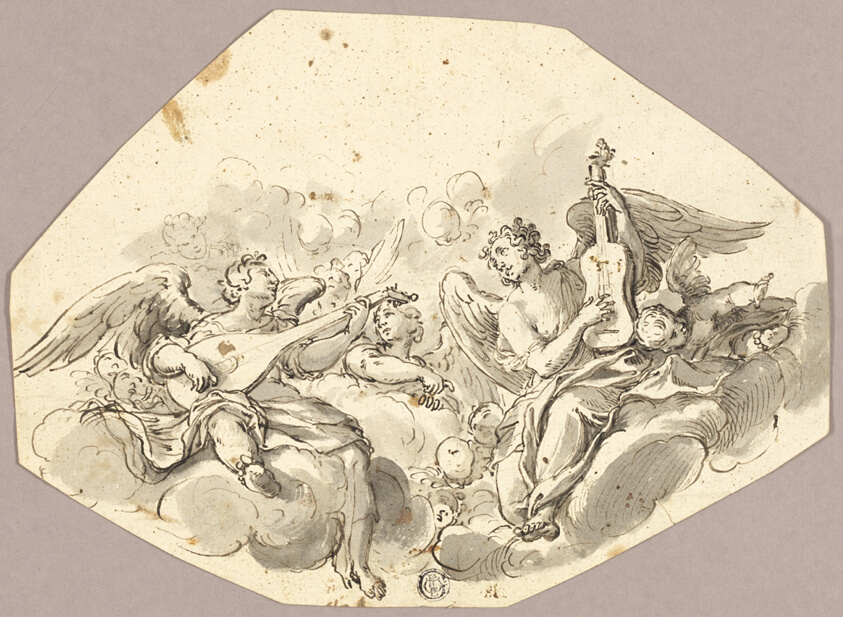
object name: Drawing and Watercolor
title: Musician Angels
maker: Attributed to Giovanni Battista Tiepolo; Italian, 1696–1770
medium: Pen and brown ink, with brush and gray wash, on cream laid paper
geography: Italy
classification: pen and ink drawings; drawings (visual works); prints and drawing